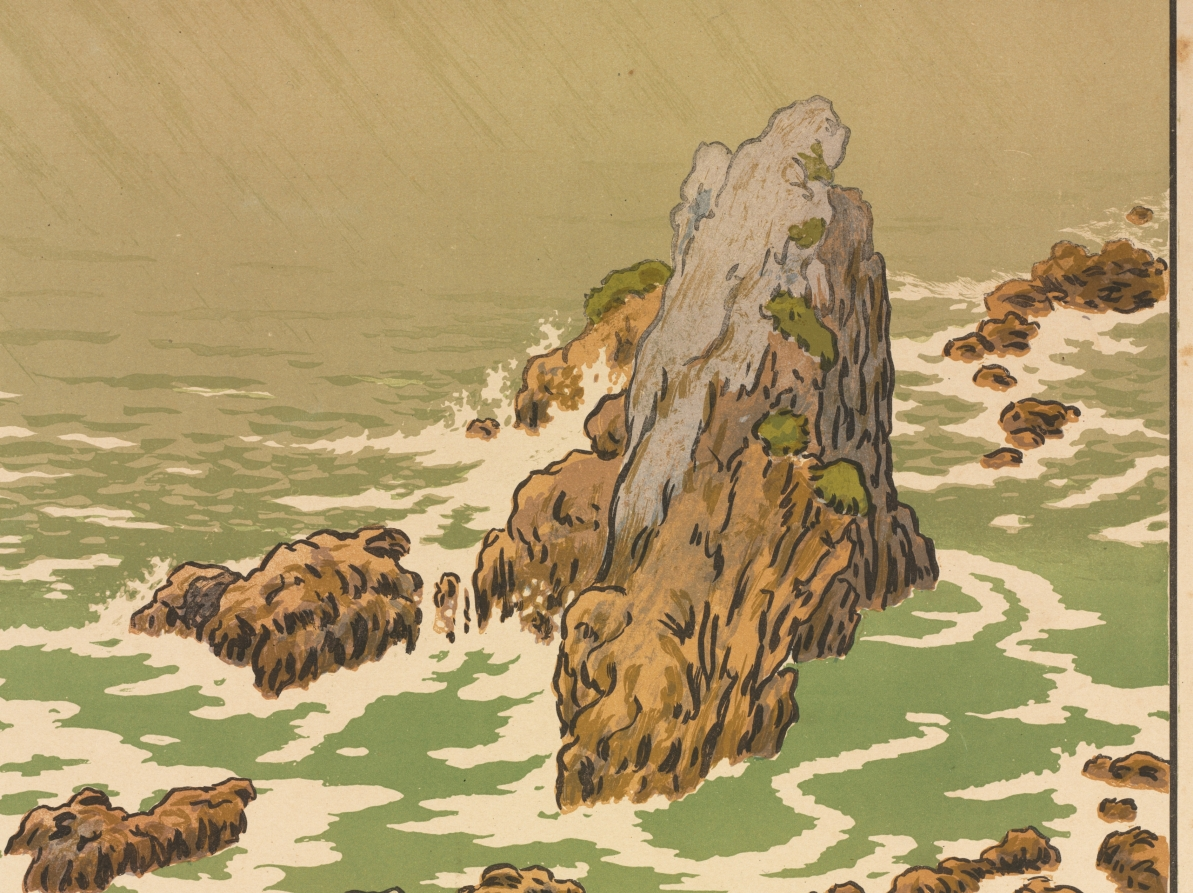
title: Aspects of Nature: The Cliff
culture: France, 19th century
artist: Henri Rivière (French, 1864–1951)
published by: Printed by Verneau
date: 1897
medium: color lithograph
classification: Print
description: One of sixteen images in the series Aspects of Nature, this lithograph depicts a view from Rivière’s summer home in Brittany. Rivière chose this site for the house—perched high atop gray rocks among pine trees and heather—because “[y]ou could believe yourself at the end of the world there . . . the noise of the winds and the sea, the cries of birds . . . a call of a sailor were the only sounds which enlivened the harmonious landscape, which changed in itself and its colors according to the effects and the hours.” This image of two children and a flock of sheep poised on a cliff’s edge overlooking a vast, turbulent sea perfectly evokes Rivière’s description. His brilliantly colored, large-format landscape prints played a pivotal role in the revival of the artistic lithograph at the end of the 19th century in France. The artist championed the idea that prints should be large in size, issued in large editions, and sold for relatively inexpensive prices so that art would be accessible to the general public. Rivière’s so-called mural prints were used to decorate homes, schools, shops, and restaurants.